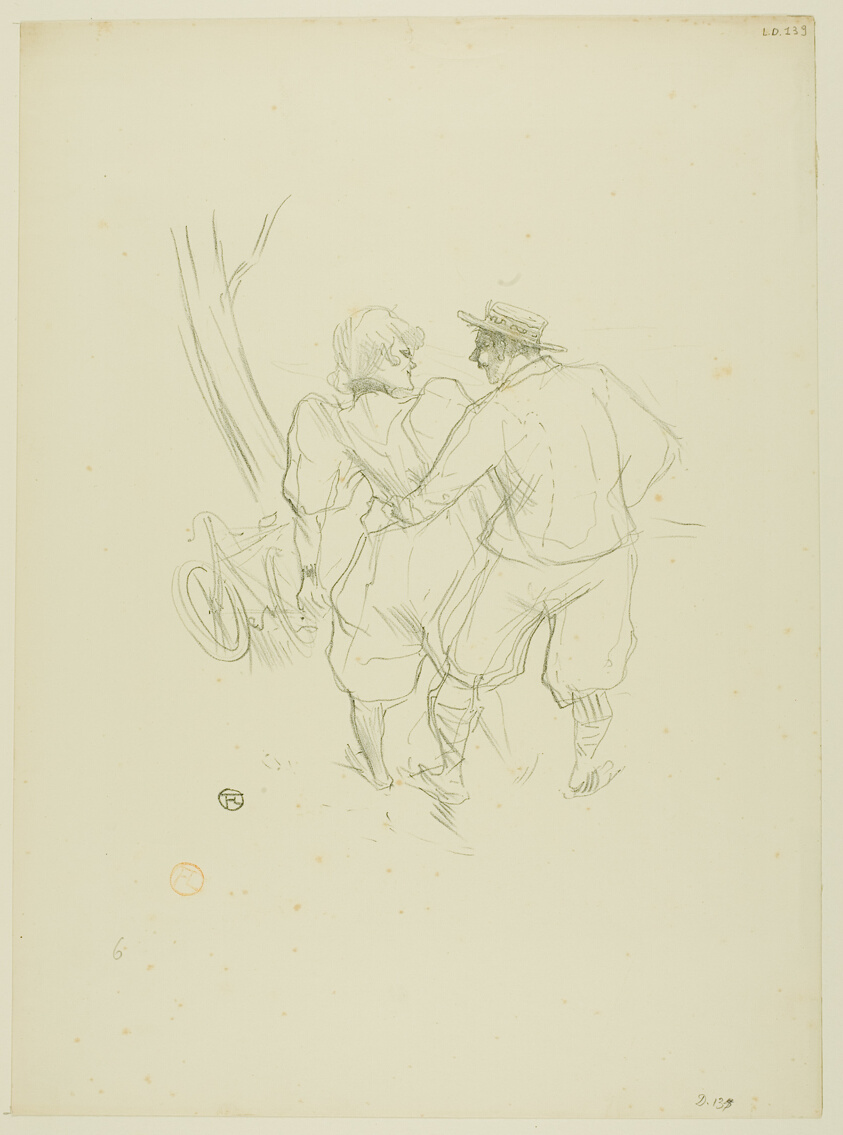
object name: Print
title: Floréal, from Mélodies de Désiré Dihau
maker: Henri de Toulouse-Lautrec (French, 1864-1901)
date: 1895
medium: Lithograph on cream wove paper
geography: France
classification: lithograph; print; prints and drawing